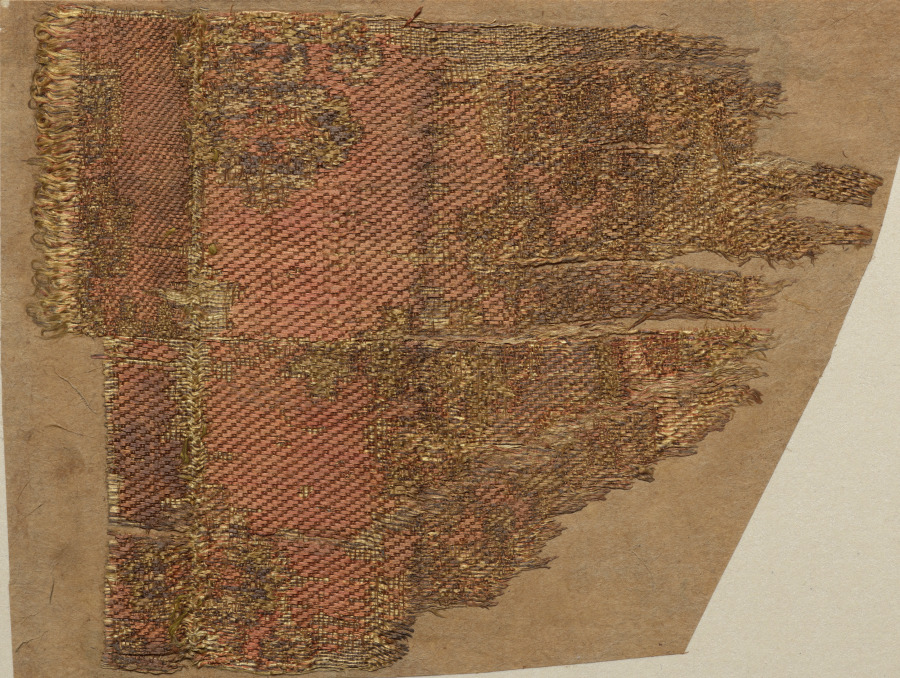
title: Fragment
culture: China, 8th century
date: 700s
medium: compound twill, silk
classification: Textile